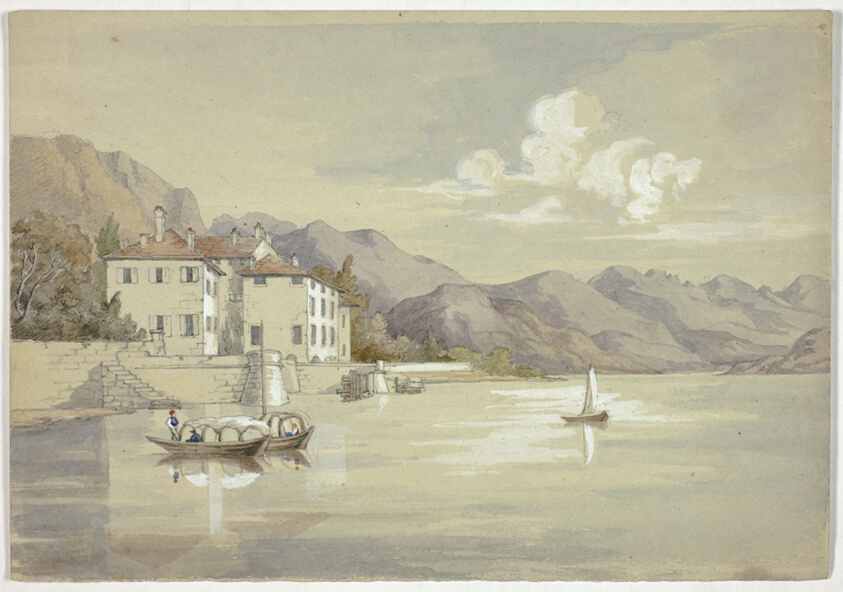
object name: Drawing and Watercolor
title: Majolica, Lake Como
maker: Elizabeth Murray (English, c. 1815-1882)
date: September 1841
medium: Watercolor and white gouache over graphite on gray wove paper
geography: England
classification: watercolor; drawings (visual works); prints and drawing